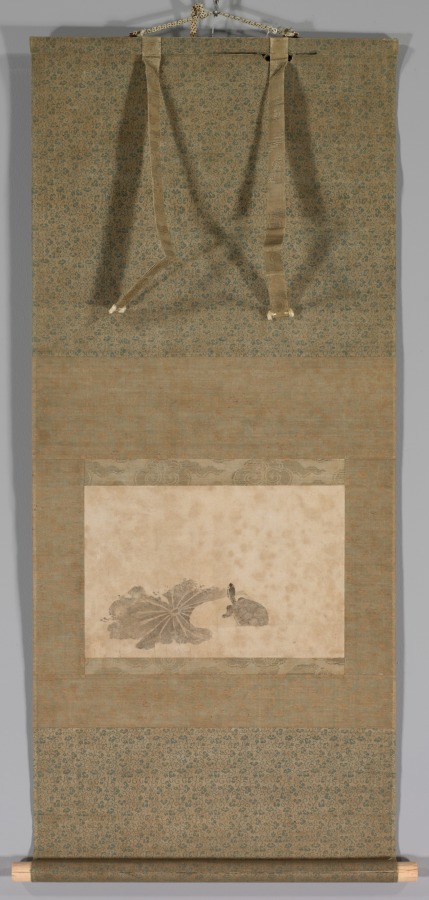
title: Turtle in a Lotus Pond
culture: Japan, Edo period (1615–1868)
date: 1700s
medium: hanging scroll; ink on paper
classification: Painting